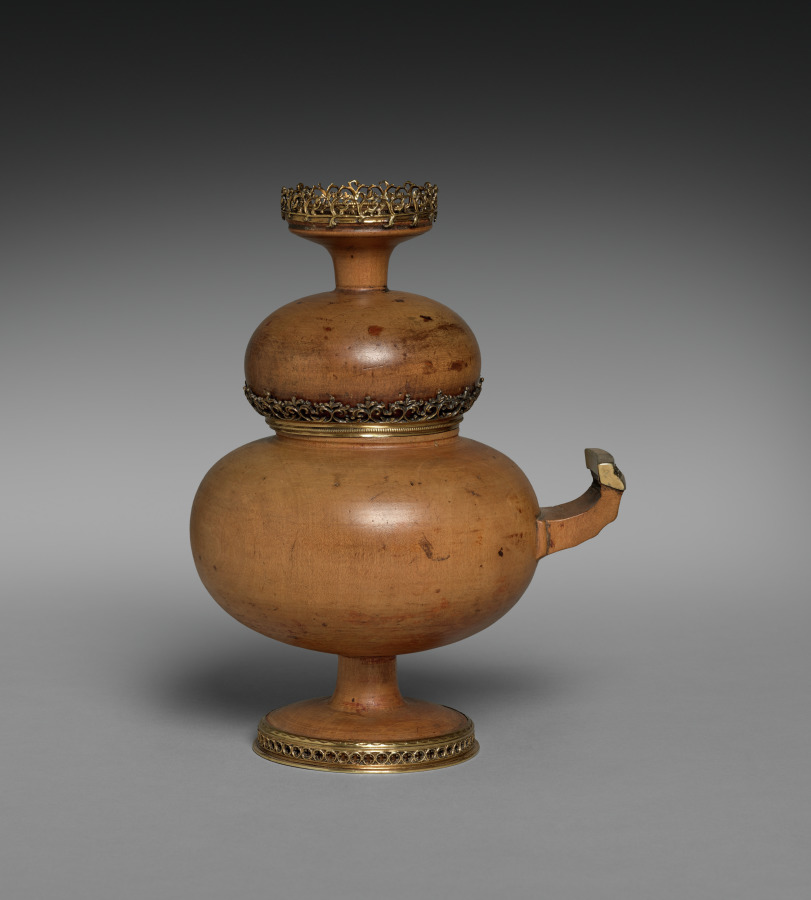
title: Double Cup (Mazer)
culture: Germany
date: c. 1530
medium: maple wood with gilt-silver mounts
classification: Wood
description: A characteristic form of drinking vessel made of close-grained wood, especially maple, was developed in Germany as early as the thirteenth century. It consisted of a larger cup with a foot and a handle and a smaller cup on top. The upper one served as a lid but could also be removed and used as a separate drinking vessel. In this example the smaller upper cup is inset with a memorial portrait medallion of Albrecht Dürer made in the year of his death, 1528. The medal is the work of Matthes Gebel who was active in Nuremberg and Augsburg as a medallist from 1523 to his death in 1574. The reverse of the medal is set into the base of the larger lower cup.